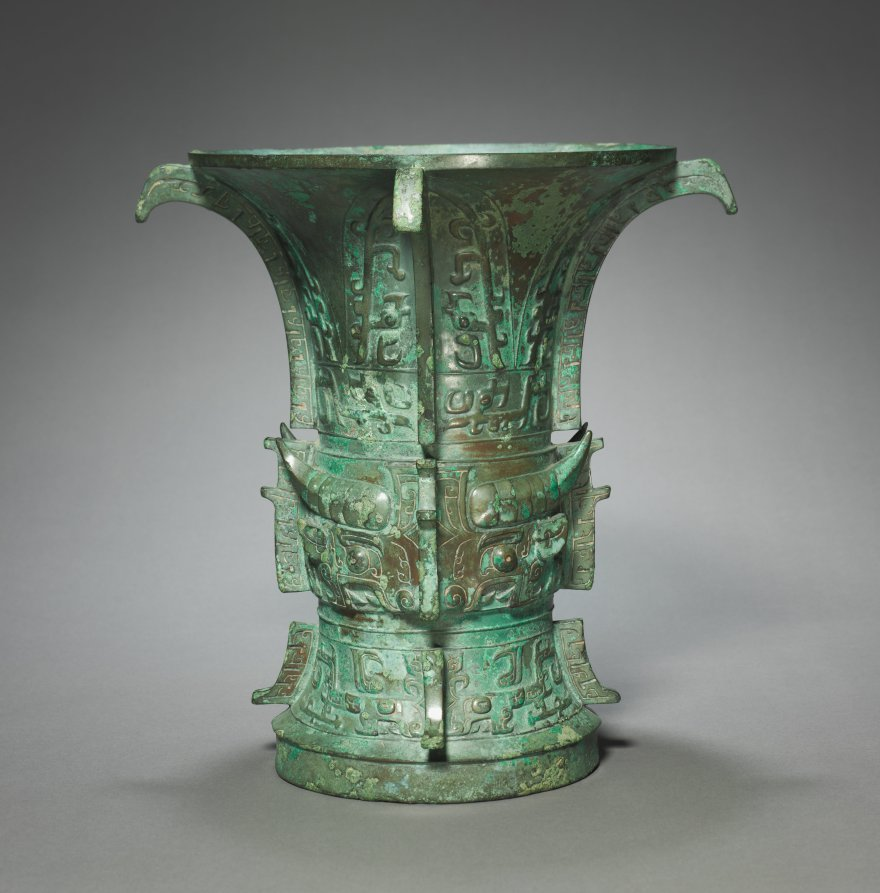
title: Wine Vessel (Zun)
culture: China, Western Zhou dynasty (c. 1046–771 BCE)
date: c. 1000 BCE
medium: bronze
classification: Metalwork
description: Although the Zhou defeated the Shang, the performance of religious rites and the casting of ceremonial bronzes continued. Zhou bronze art, nevertheless, reveals the artistic sentiments of a new era. There was as much confidence in the achievements of the living as observance of ritual duties for the dead. For example, this wine vessel combines artistic imagination with a display of strength and force. Bold images of buffalo heads with protruding horns were cast onto the middle section. Together with the four notched flanges extending downward below the flaring mouth, there is an effect of overflowing energy.